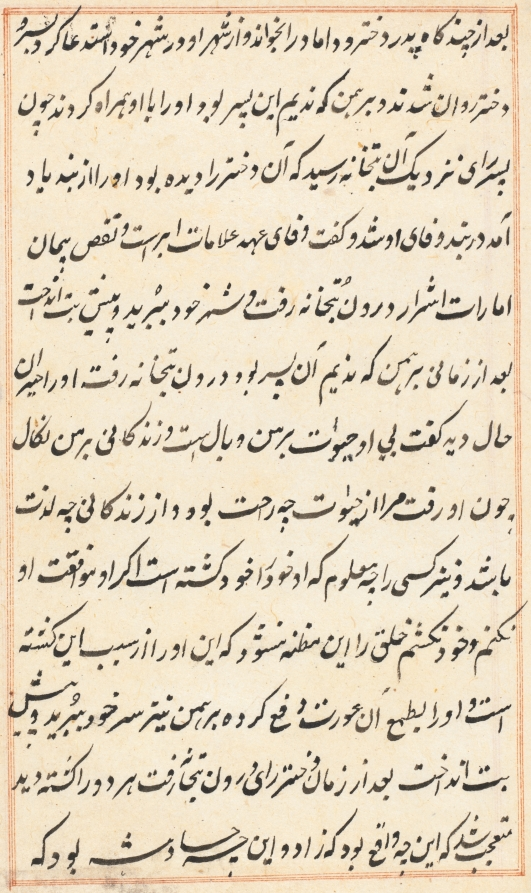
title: Page from Tales of a Parrot (Tuti-nama): text page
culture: Mughal India, court of Akbar (reigned 1556–1605)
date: c. 1560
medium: gum tempera, ink, and gold on paper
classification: Painting